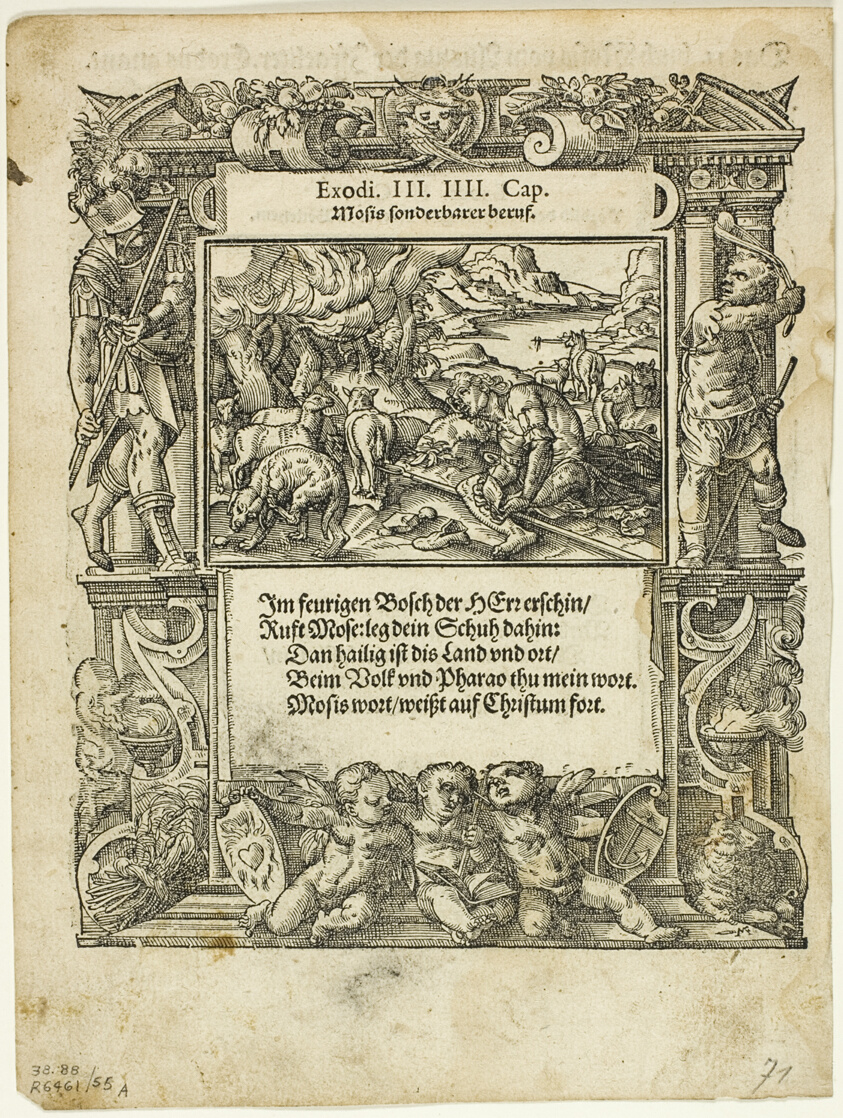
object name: Print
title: Moses and the Burning Bush (recto) and The Infant Moses Put into the River (verso) from Neue künstliche Figuren biblischer Historien, plate 55 from Woodcuts from Books of the XVI Century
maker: Tobias Stimmer (Swiss, 1539-1584); assembled by Max Geisberg (Swiss, 1875-1943)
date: 1578, assembled into portfolio 1937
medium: Woodcut on paper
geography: Switzerland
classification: woodcut; print; prints and drawing